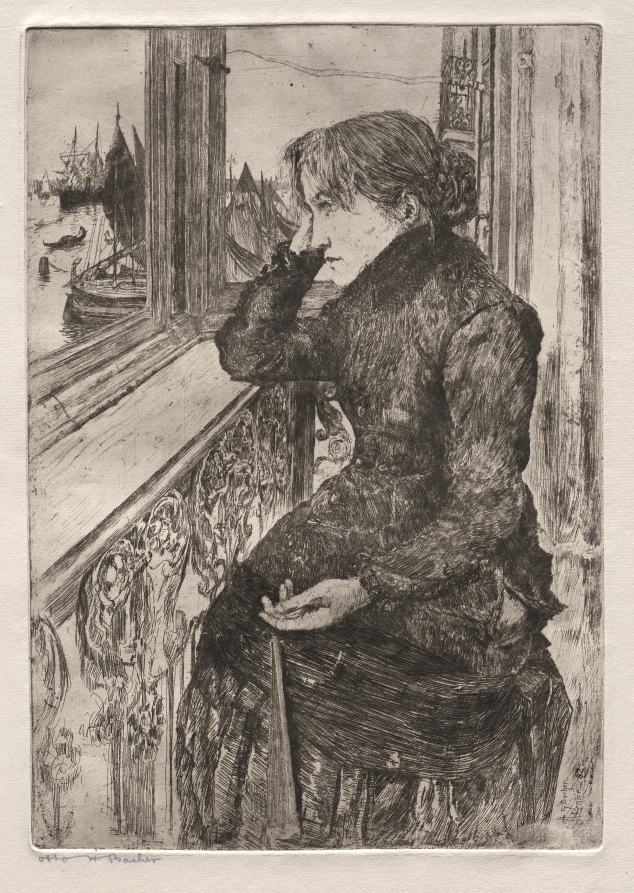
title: Etchings of Venice: Beautiful View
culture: America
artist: Otto H. Bacher (American, 1856–1909)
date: 1882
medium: etching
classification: Print